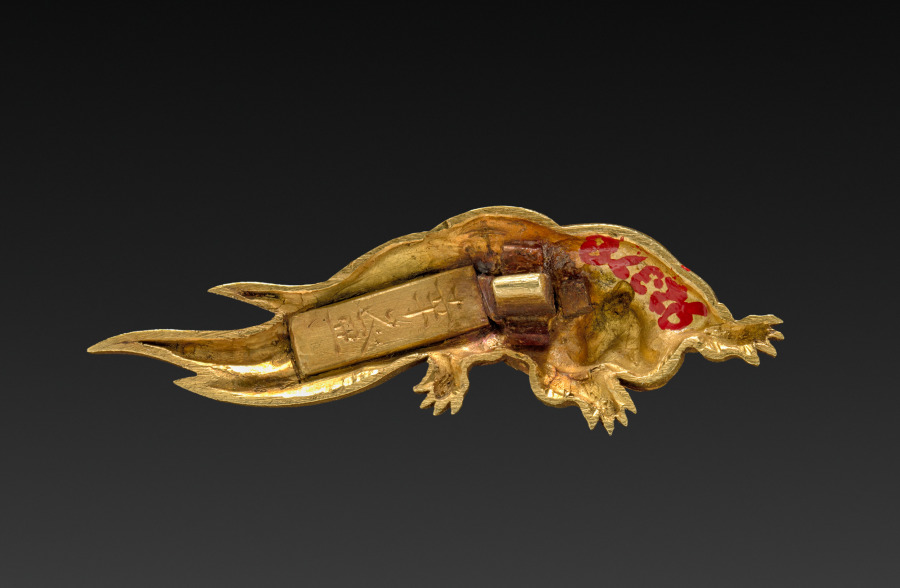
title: Tortoise-shaped Sword-Grip Ornament (Menuki)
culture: Japan, possibly Edo period (1615-1868)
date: c. 1615–1868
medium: gilt bronze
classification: Metalwork